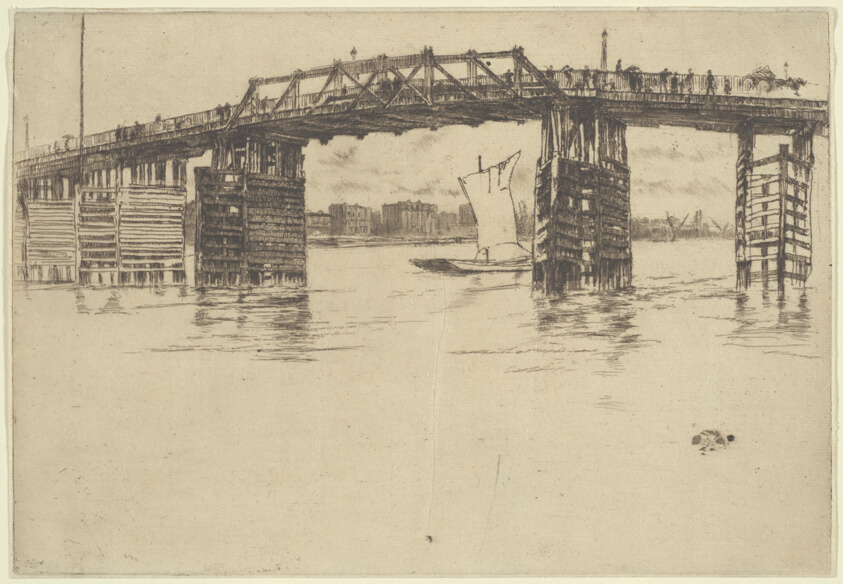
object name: Print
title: Old Battersea Bridge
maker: James McNeill Whistler (American, 1834-1903)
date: 1879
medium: Etching and drypoint in black ink on cream laid paper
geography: United States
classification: etching; drypoint; print; prints and drawing; paper